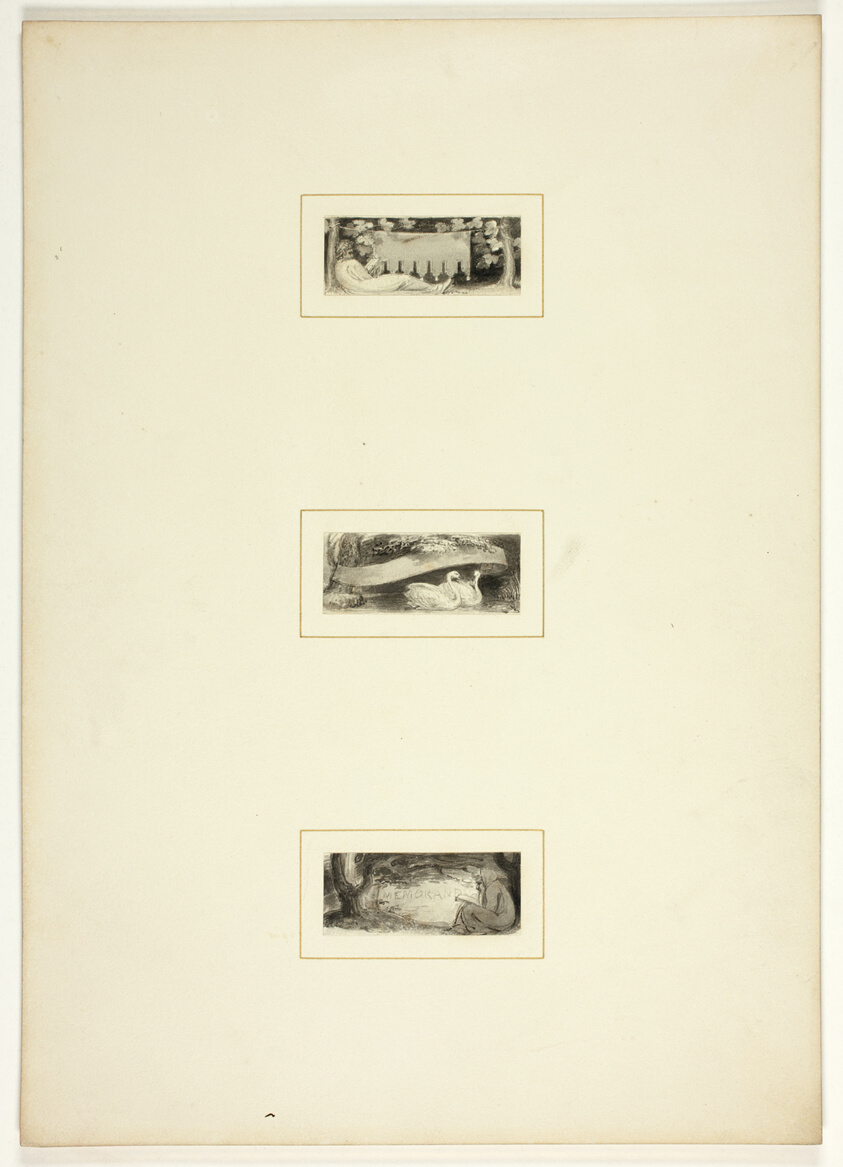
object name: Drawing and Watercolor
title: Study for a plate from Telemachus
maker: Thomas Stothard (English, 1755-1834)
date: c. 1796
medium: Ink wash on paper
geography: England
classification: ink and wash; prints and drawing; paper; drawings (visual works)